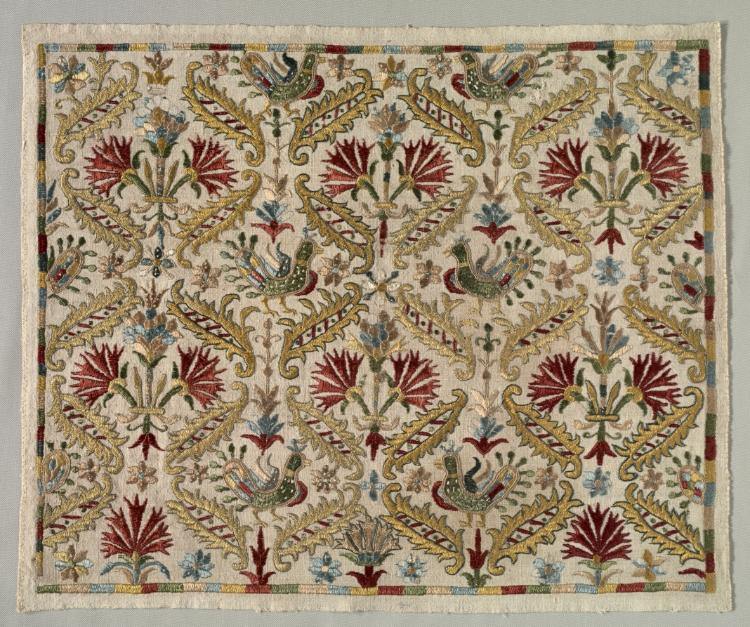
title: Fragment of a Skirt Border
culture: Greece, Crete, 18th century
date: 1700s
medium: embroidery: silk on linen tabby ground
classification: Embroidery